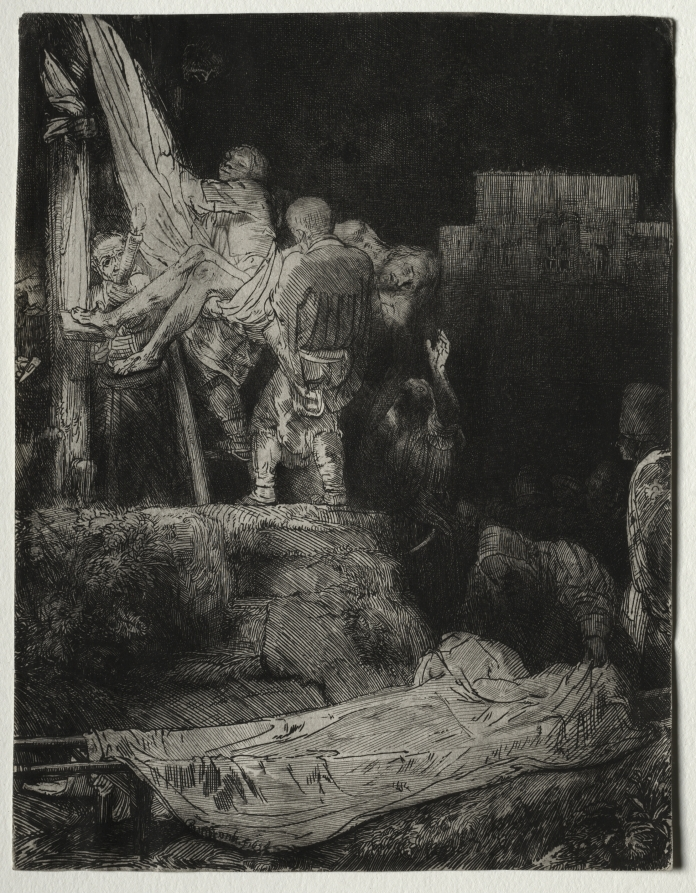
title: The Descent from the Cross by Torchlight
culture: Netherlands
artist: Rembrandt van Rijn (Dutch, 1606–1669)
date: 1654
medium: etching and drypoint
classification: Print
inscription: lower left, in plate: Rembrandt. f 1654['a] reversed ; VERSO, upper left, in graphite: 1[circled] ; lower left, in pen and black ink: n c "[horizontal line through two short vertical lines] ; lower left, in graphite: R937J ; lower center, in graphite: C ; lower right, in graphite: A